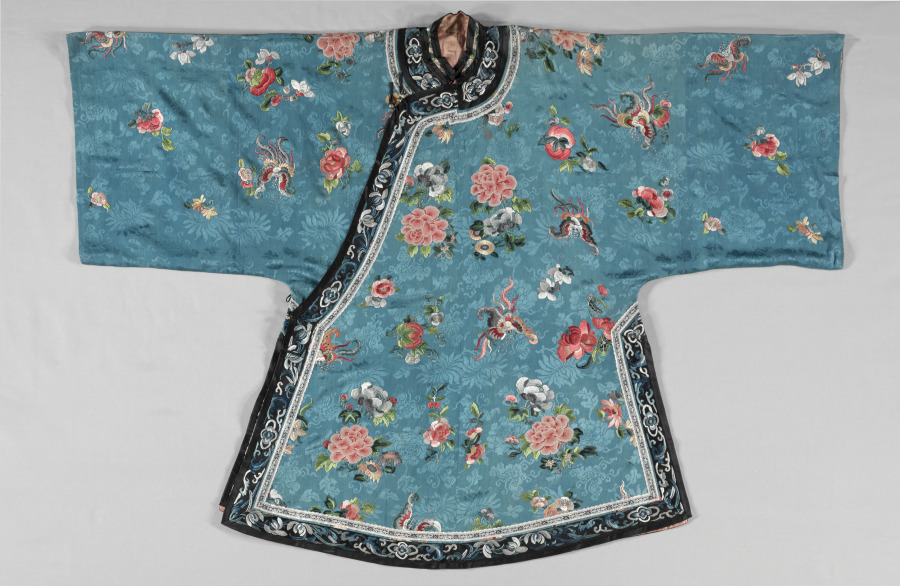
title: Han Woman's Jacket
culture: China, Qing dynasty (1644–1911)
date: 1880s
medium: Silk: embroidery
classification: Garment